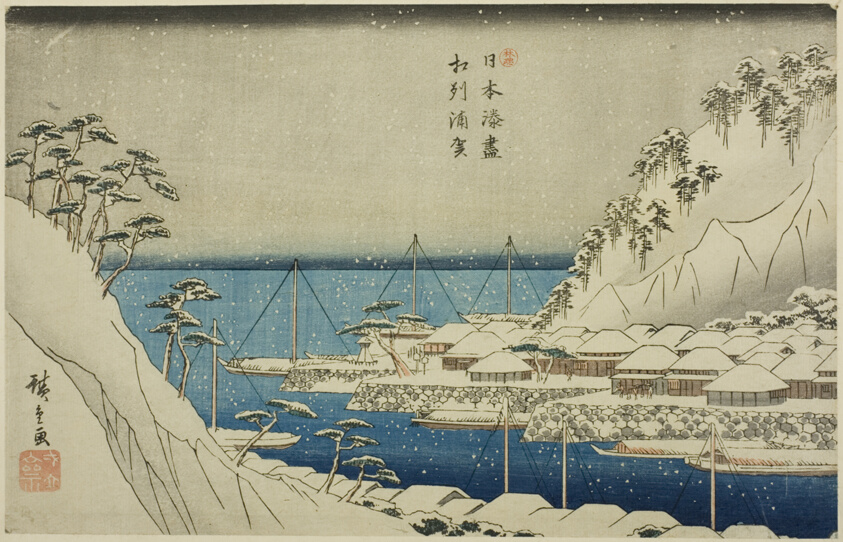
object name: Print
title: Uraga in Sagami Province (Soshu Uraga), from the series "Harbors of Japan (Nihon minato zukushi)"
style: Japanese (culture or style)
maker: Utagawa Hiroshige 歌川 広重; Japanese, 1797-1858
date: c. 1840/44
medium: Color woodblock print; oban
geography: Japan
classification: woodblock print; print; asian art